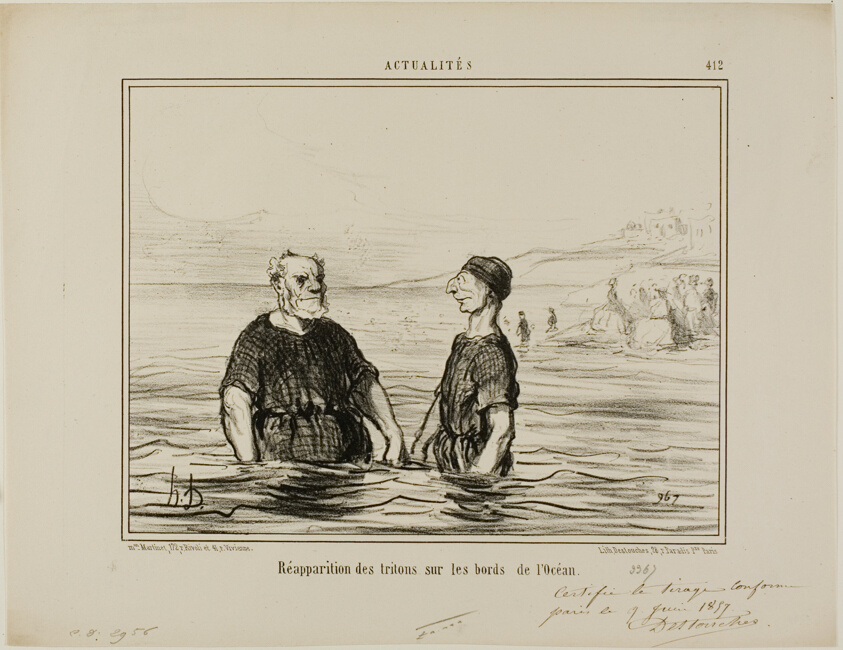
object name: Print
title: The Reappearance of the Tritons of the Sea, plate 412 from Actualités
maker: Honoré Victorin Daumier; French, 1808-1879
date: 1857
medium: Lithograph in black on ivory wove paper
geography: France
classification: lithograph; print; prints and drawing